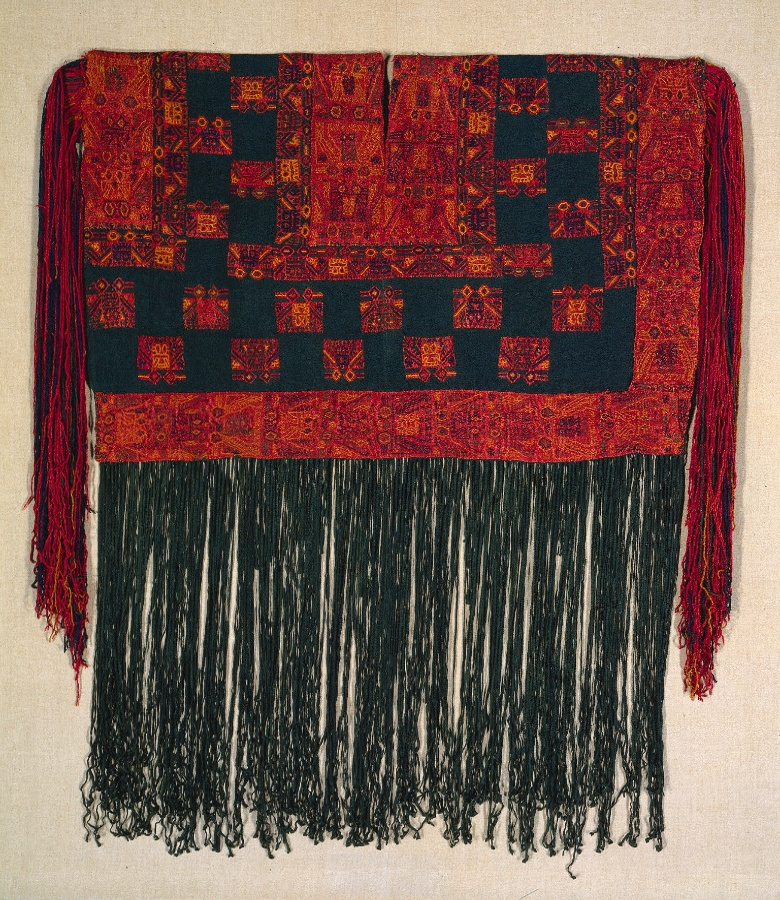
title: Tunic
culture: Peru, South Coast, Paracas (Cavernas) style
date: c. 300 BCE–200 CE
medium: Alpaca wool: plain weave with embroidery and warp substitution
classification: Textile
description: Brightly dyed wool yarns found in many ancient Peruvian textiles come mainly from alpacas that were domesticated and selectively bred to produce long, soft, lustrous fiber. The finely spun yarns in a broad range of colors as seen on this tunic—well preserved after approximately 2,000 years of burial—attest to the Paracas people’s considerable artistry. A double-headed bird motif appears multiple times throughout the tunic’s design.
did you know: Fine textiles were one of the most prestigious commodities in the ancient Andes.